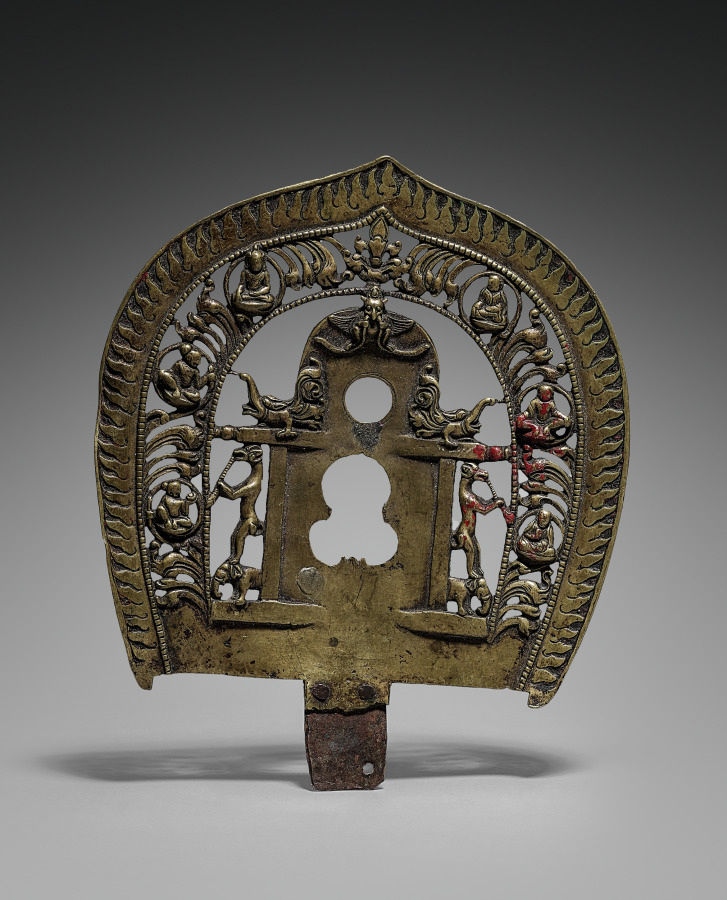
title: Halo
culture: Tibet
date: 1200s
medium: bronze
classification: Sculpture